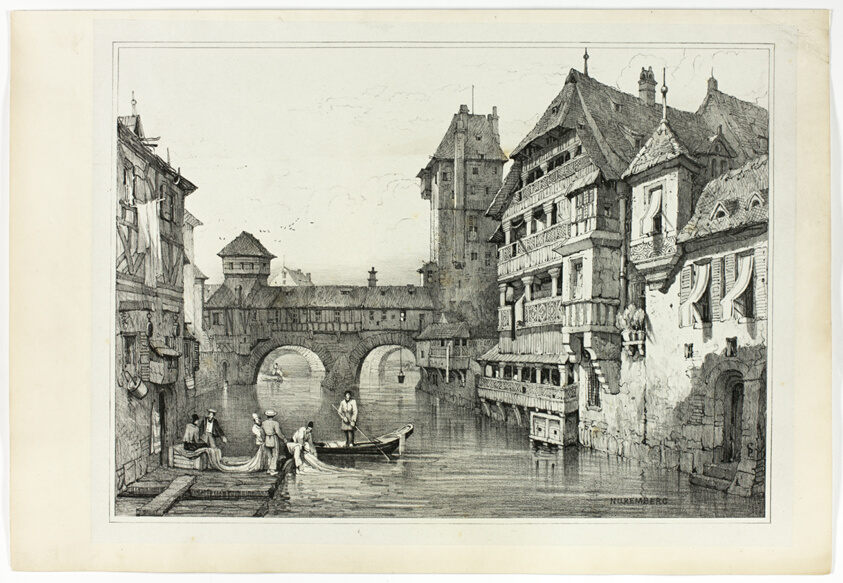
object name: Print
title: Nuremberg, from Facsimiles of Sketches made in Flanders and Germany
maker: Samuel Prout (English, 1783-1852); printed by Charles Joseph Hullmandel (English, 1789-1850)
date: 1833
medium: Lithograph in black on grayish-ivory chine, laid down on ivory wove paper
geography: England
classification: lithograph; print; prints and drawing